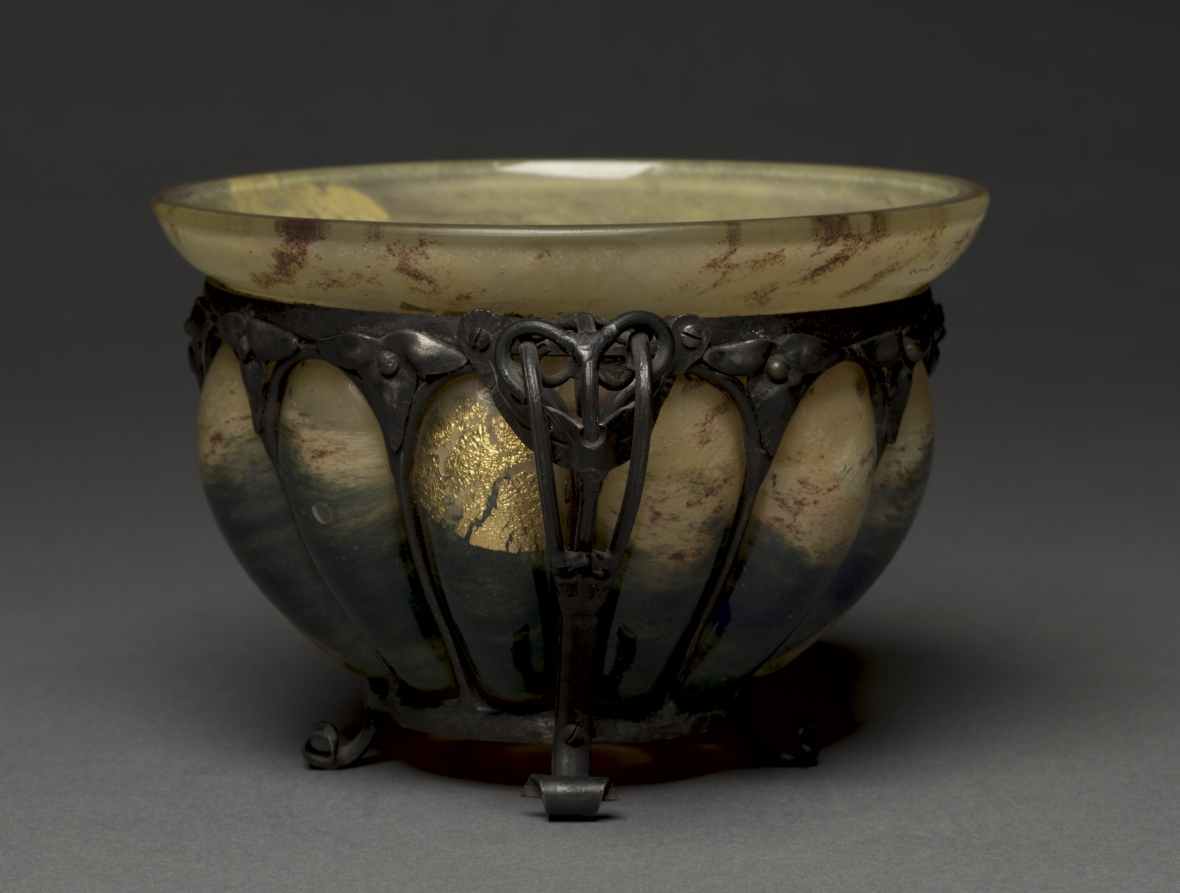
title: Bowl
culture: France, Nancy, 20th century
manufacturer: Daum Brothers (French)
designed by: Louis Majorelle (French, 1859–1926)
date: 1900–1925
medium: glass blown into bronze cage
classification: Glass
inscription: signed on bottom: "Daum/Nancy/ [symbol] / L.Majorelle." Inscribed on rim: "Captain Lawrence Norton/l'Ecole de la Metallurgie de Nancy/1921."